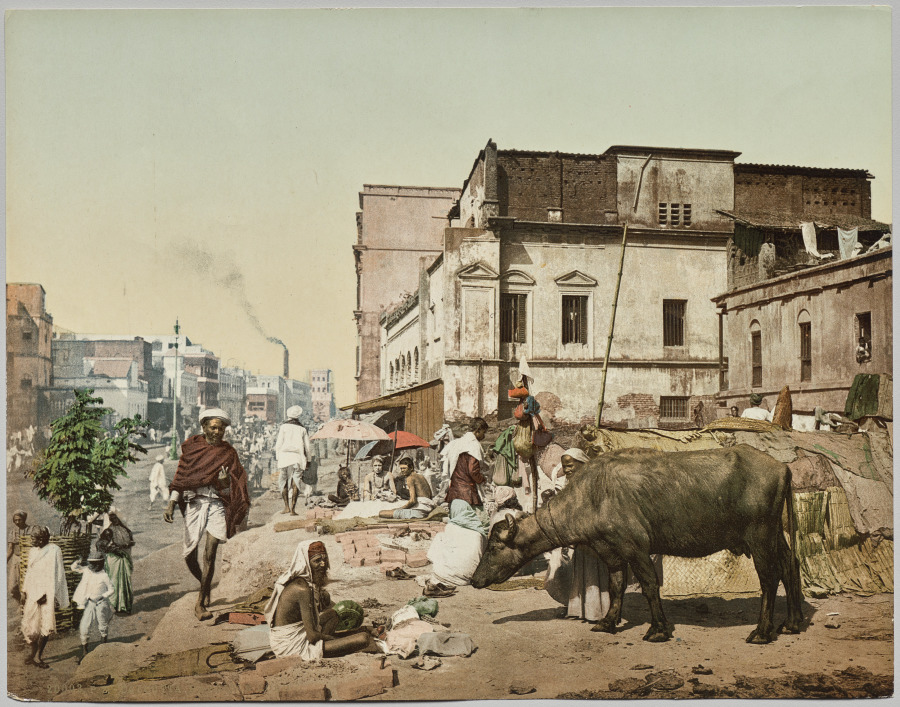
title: India. Calcutta. Harrison Road I with Group of Jogees, after photo by Dr. Kurt Boeck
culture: India, 19th century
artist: Photoglob Co. (Zurich, active c. 1890–1910)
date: c. 1890–1910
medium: Photochrom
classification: Photograph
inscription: Imprinted in gold type on recto: “2003.P.Z-CALCUTTA. HARRISON ROAD.I”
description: The light poles in the image suggest the photo was taken after that event. The Jogees or Jogis are a rapidly shrinking caste that began as a community of people who practiced yoga and worshipped the Hindu god Shiva. Many earn their living as religious beggars. They traditionally wear saffron-colored clothing, but the printers in Switzerland who added the color to this image did not know that.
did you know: In 1899, Harrison Road (now Mahatma Gandhi Road) became the first road to be lit by electricity in Kolkatta (formerly Calcutta).